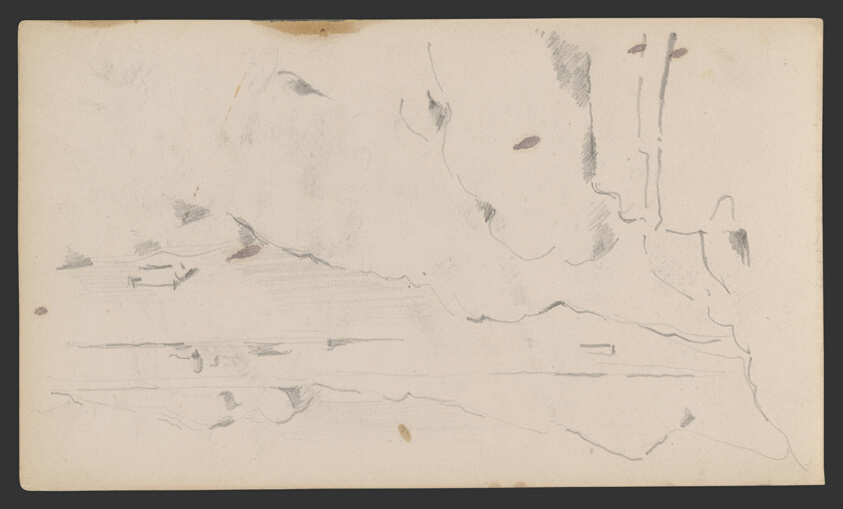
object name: Drawing and Watercolor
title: Sketchbook No. 2 (L'Estaque)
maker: Paul Cézanne; French, 1839-1906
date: 1875–86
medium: Graphite and pen and ink drawings on paper, bound into a book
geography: France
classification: sketchbook; graphite; prints and drawing; paper